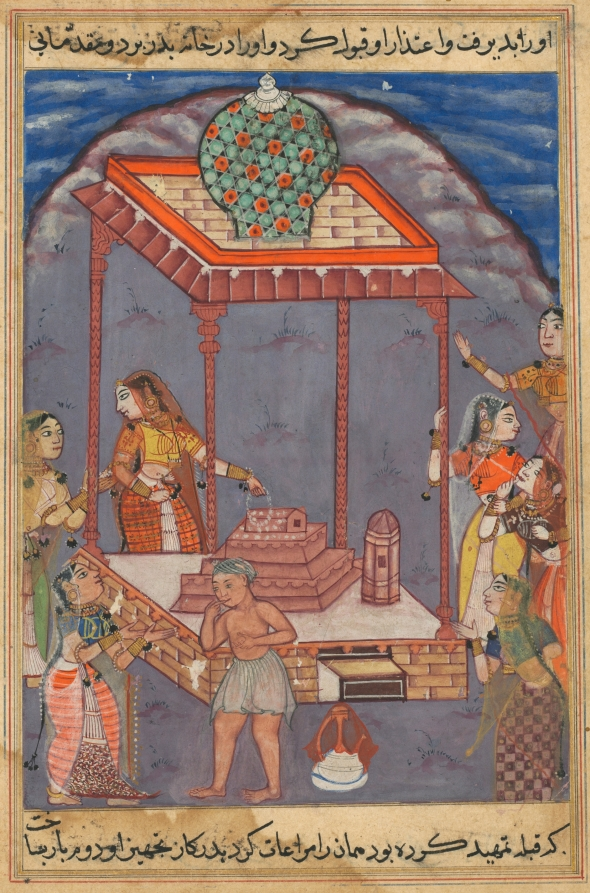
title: The destitute Mukhtar meets his wife Maimuna at a holy shrine, from a Tuti-nama (Tales of a Parrot): Twenty-fifth Night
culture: Mughal India, court of Akbar (reigned 1556–1605)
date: c. 1560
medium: gum tempera, ink, and gold on paper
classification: Painting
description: In the center of the image, a surprised Mukhtar, dressed in rags, confronts his wife. A few days prior, he had attempted to kill her in order to steal all of her possessions. Now destitute, Mukhtar begs for his wife’s forgiveness, which she grants.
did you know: A woman places a garland on a cenotaph, probably marking the grave of a Sufi holy man.